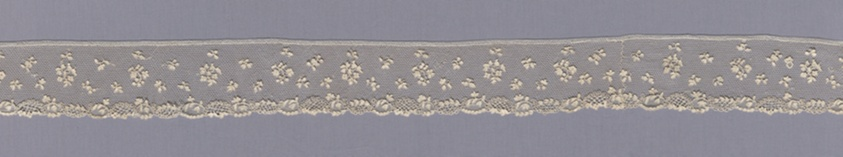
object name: Textile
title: Border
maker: France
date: 1775/1800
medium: Linen, needle lace of a type known as "Point d'Argentan" with buttonholed mesh ground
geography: France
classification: textile; lace - needle